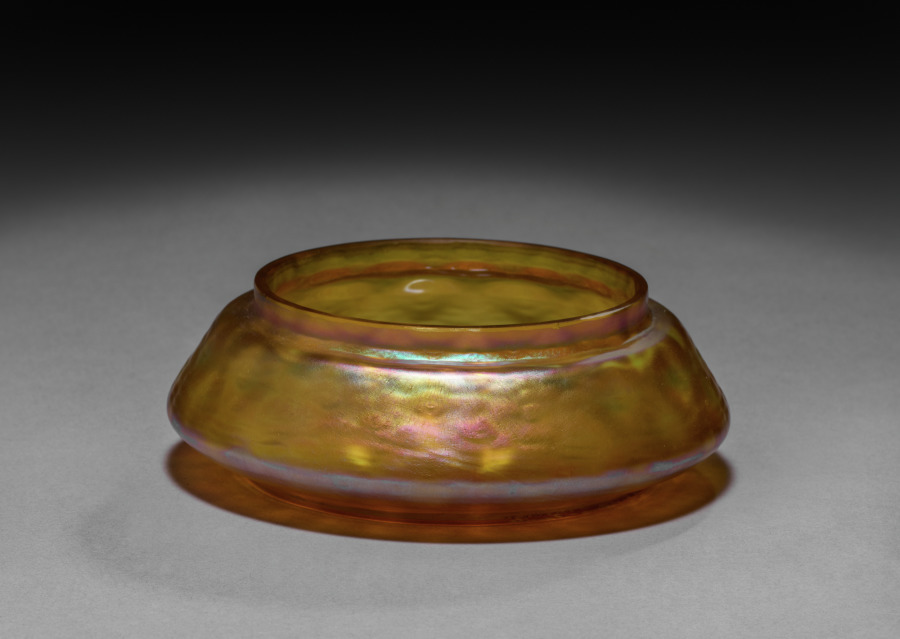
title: Box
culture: America, New York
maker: Tiffany Glass & Decorating Company (America, New York, 1892–1902)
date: c. 1898–1902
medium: Favrile glass, enamel on copper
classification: Glass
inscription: Louis C. Tiffany Favrile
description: By 1900 Tiffany had expanded his empire by increasing the firm’s production of “fancy goods,” including inkstands, candlesticks, clocks, small boxes, desk sets, tea screens, and other functional objects. Along with the array of artistic glass designs from his factory in Corona, Queens, works in ceramic, bronze, other metals, and even jewelry abounded. These smaller, more affordable luxury items were designed with as much thought to artistry as the great stained glass windows and lamps through which the firm enjoyed unrivaled success.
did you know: This fanciful dressing table accessory likely contained dusting powder and a feather puff.